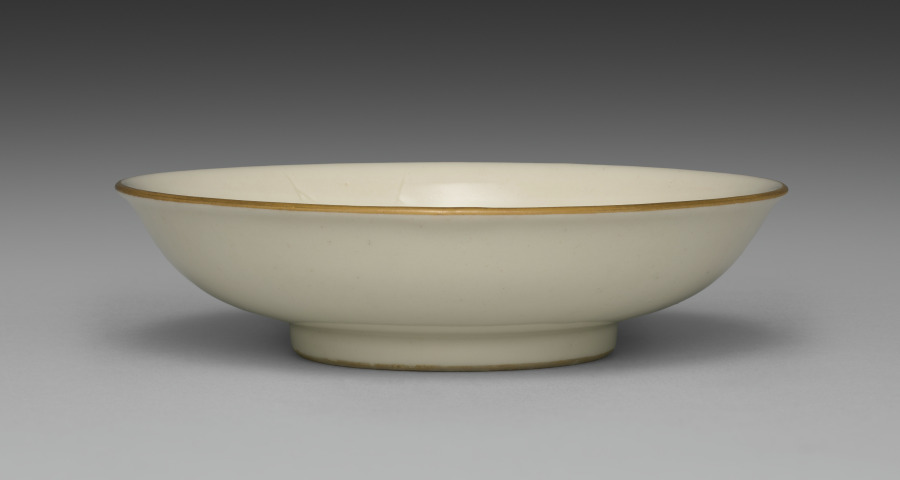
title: Small Dish from Dining Set with Plum Blossoms and Cracked-Ice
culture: Japan, Meiji period (1868–1912)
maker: Seifū Yohei II (Japanese, 1844–1878)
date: c. 1875–78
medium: Porcelain with molded designs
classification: Ceramic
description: Each item in this set has a delicate low-relief design of flowering plum branches over scattered, intersecting lines meant to resemble the cracked-ice surface of a frozen body of water and is signed on the base in gold pigment. While Yohei II produced many fine works in underglaze blue, like those produced by Kiyomizu Shichibei, he also made works in quite different styles later in his career, from the early 1870 s. In 1873, he was appointed purveyor to the Industrial Center of Kyoto Prefecture, a designation associated with Kyoto’s efforts to reach an international market through the port of Kobe; and from 1875 until his death, he was involved in national-level projects to present Japanese ceramics across the world. It was during this period that Yohei III was apprenticed to Yohei II, and it has been suggested that this set may in fact be an early example of Yohei III’s work, which he signed with his teacher’s name. Decorated with flowers resembling Japanese textile motifs, the set calls to mind the design of Yohei II’s pair of vases with plum blossoms in the Victoria and Albert Museum. Here, the elaborate trees created for a formal public exhibition setting have been translated into the approachable blossoms of the genteel domestic environment. While the designs are consistent across the pieces, each raised flower petal and pistil and each incised line in the ice was done by hand, so the cups, bowls, and dishes are similar yet unique. The bottoms of two boxes once identified the set’s owner, but the information has been deliberately obscured with black ink. However, inscriptions still visible appear to indicate two occasions, once at the end of July 1886 , and once again in June 1916 , when parts of the set were requested from Hokura in Niigata Prefecture. The location corresponds to a neighborhood in the present-day city of Jōetsu. The surname Tsuji 辻 also appears on a paper tag affixed to one of the box cloths. Future research may possibly reveal more about their provenance. A vase by Yohei III in a private collection combines the formal grandeur of the Yohei II vases in the Victoria and Albert Museum with the gentler design of this dining set, placing flowering plum trees against soft, scalloped-edge clouds resembling those in golden screens.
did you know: The dining wares have a creamy white coloration that the four boxes containing them identify as Korean in style.